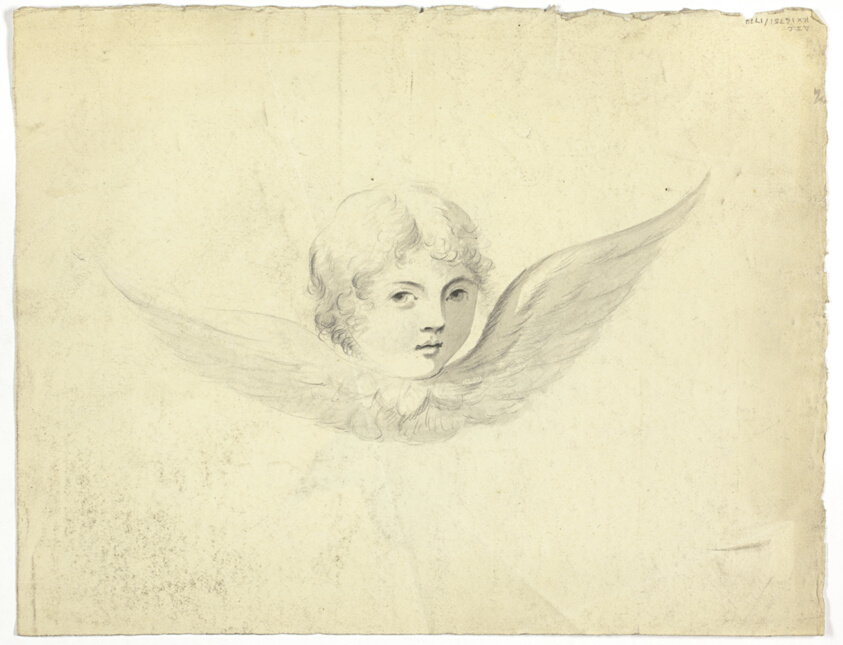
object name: Drawing and Watercolor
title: Bust of Youth Wearing Hat (recto); Angel Head (verso)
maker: After George Morland; English, 1763-1804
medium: Brush and gray wash, and graphite (recto and verso), on cream wove paper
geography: England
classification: ink or chalk wash; drawings (visual works); prints and drawing